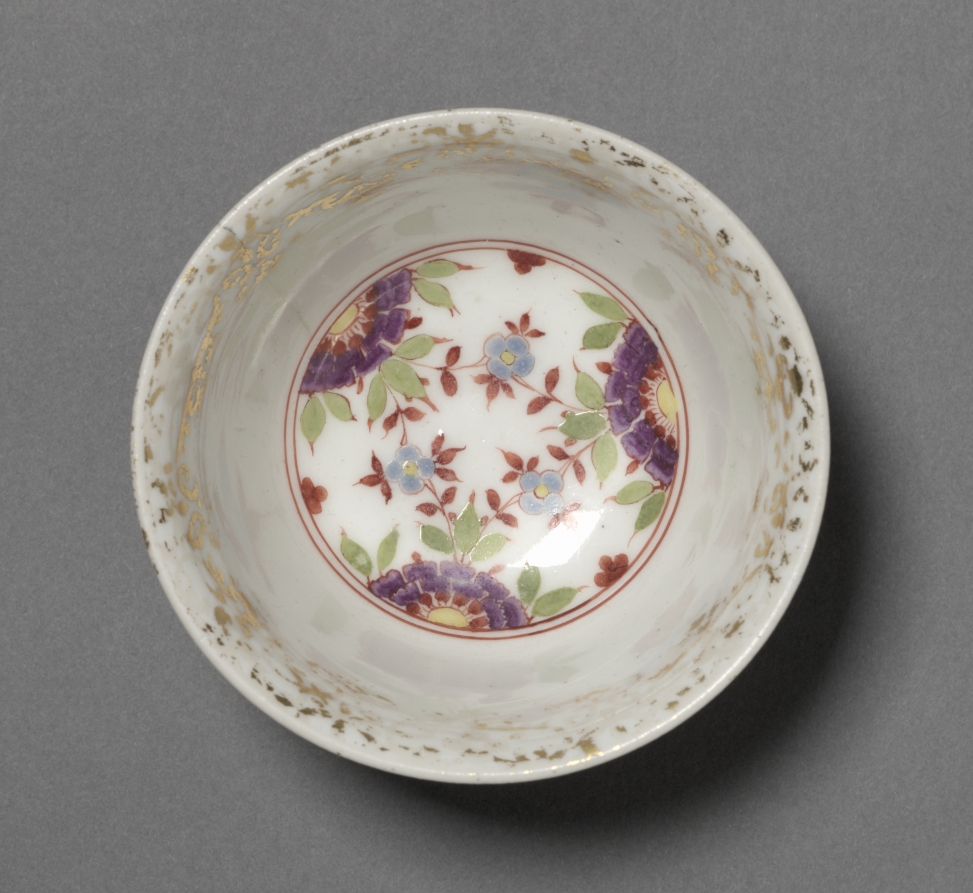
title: Cup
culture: Germany, Meissen, 18th century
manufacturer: Meissen Porcelain Factory (German, est. c. 1710)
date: c. 1725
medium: porcelain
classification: Ceramic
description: About 1725, Herold introduced a new variant of his "chinoiserie" decoration, in which small, full-length figures were depicted against cloudless skies, represented by the now brilliantly white porcelain, within foliate borders of gilt and enamel. This configuration became the standard formula for Meissen figural decoration for the next twenty years, although European subjects came to be depicted with greater frequency toward the middle of the century.